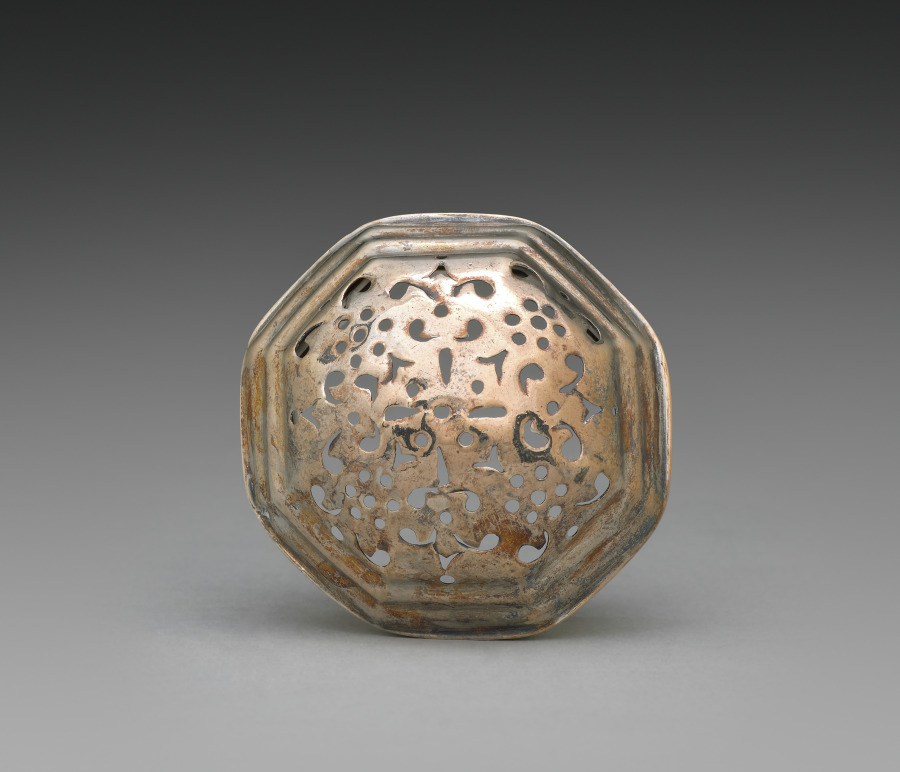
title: Caster (lid)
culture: America, Massachusetts, Boston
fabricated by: Andrew Tyler (American, 1692–1741)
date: c. 1720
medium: silver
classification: Silver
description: A caster was used to spread a finely ground substance, probably pepper.